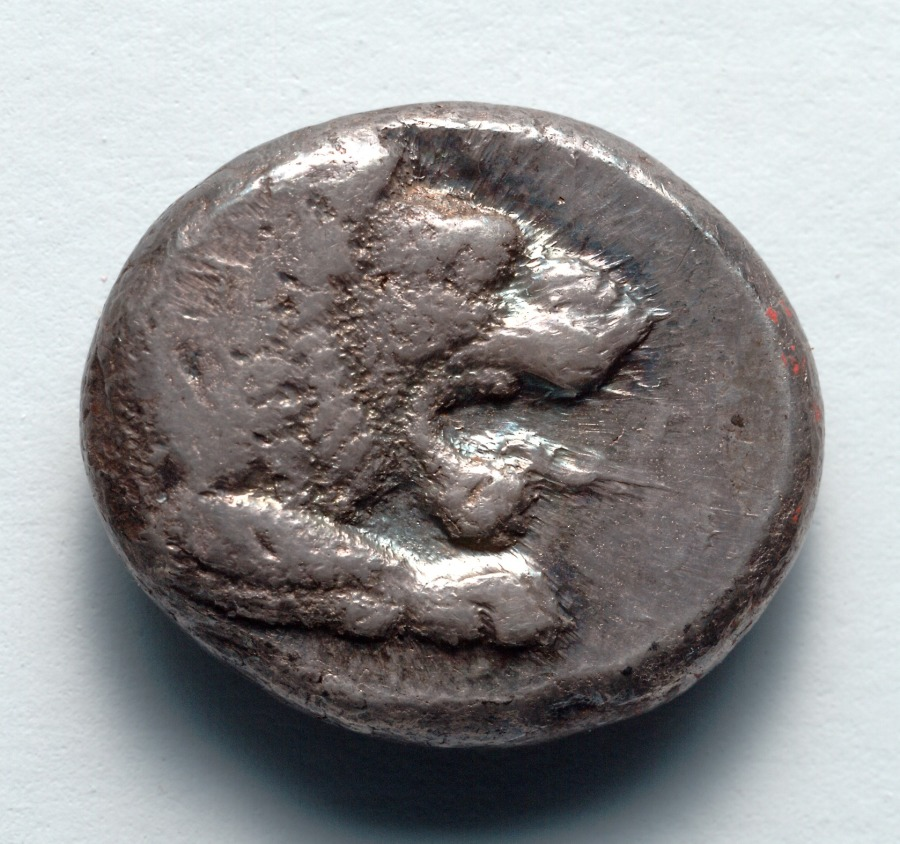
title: Drachm: Forepart of Lion (obverse); Head of Aphrodite (reverse)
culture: Greek, minted at Knidos (Karia)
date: 465–449 BCE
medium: silver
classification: Coins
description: The lion, king of the beasts and an animal associated with regal and heroic power, featured prominently on the coinage of many ancient Greek city-states. Artists placed the lion in a variety of poses, sometimes including the whole body, at other times the foreparts or just the head. Although it may once have roamed nearby, for many Greeks the lion was a monster nearly as exotic as the Chimaera, of which it formed a part, together with a goat head and snake-headed tail.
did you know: Although produced in the Classical period, this profile head of Aphrodite retains an Archaic look.